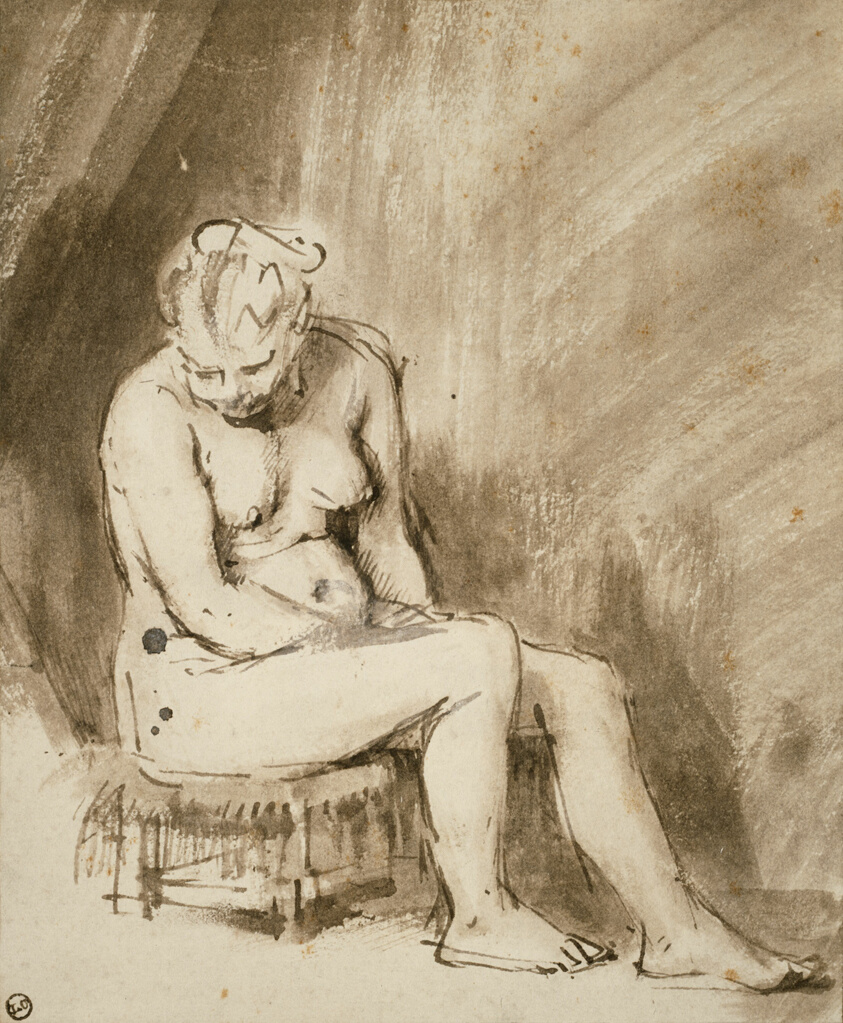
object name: Drawing and Watercolor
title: Seated Female Nude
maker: Rembrandt van Rijn (Dutch, 1606-1669)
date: 1660/62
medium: Pen and brown ink and brush and brown wash, with subtractive highlights (scraping) and touches of opaque white watercolor corrections, on ivory laid paper, laid down on cream laid card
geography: Holland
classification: pen and ink drawings; drawings (visual works); prints and drawing; paper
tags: interiors, nudes, women